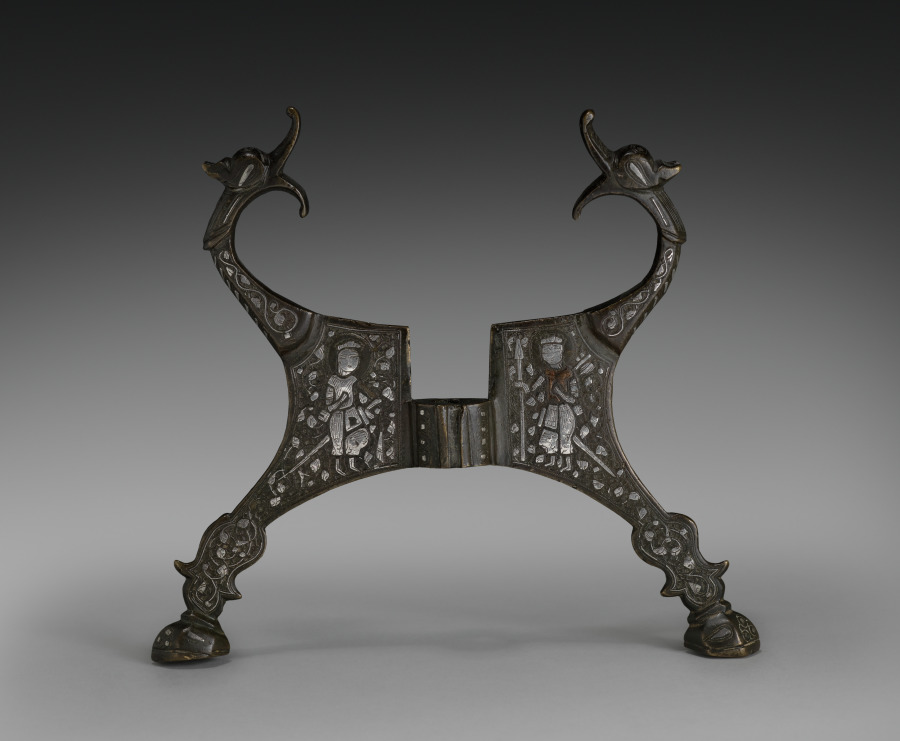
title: Dragon-headed Stand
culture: Northern Iraq or Syria, Zangid (1127–1251) or Ayyubid period (1171–1260)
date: 1200s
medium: Cast brass inlaid with silver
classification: Metalwork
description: Themes of hunting and combat are evoked by this stand with gaping dragon heads and figures armed with swords and spears.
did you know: Each hunter's head is surrounded by a nimbus.